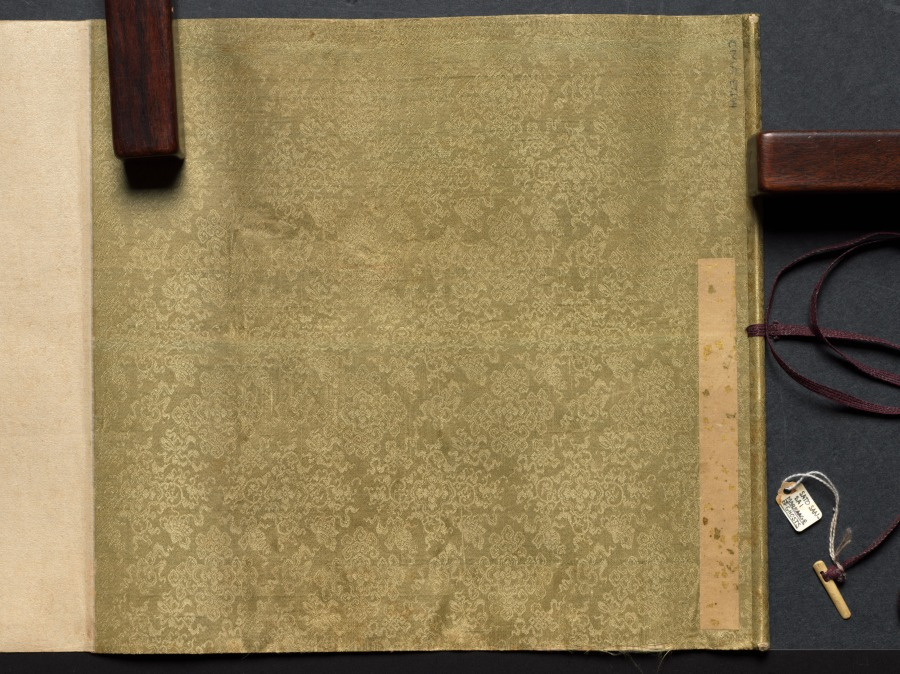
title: An Illustrated Marriage of Apparitions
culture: Japan, Edo period (1615–1868)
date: mid-1800s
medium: handscroll; ink and color on paper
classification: Painting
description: The matchmaking, engagement, wedding, and birth of the first child of two apparitions, or bakemono, literally "things that change," are illustrated in this whimsical, humorous handscroll. Japanese folklore abounds with such strange creatures, most famously represented in handscrolls featuring a procession of 100 supernatural monsters. Aside from a textual preface and cartouches indicating the content of the scenes, the tale is told visually. The artist and whereabouts of the original handscroll are unknown, but a number of other 19th-century copies by amateur painters exist in Japanese collections, attesting to its broad appeal.